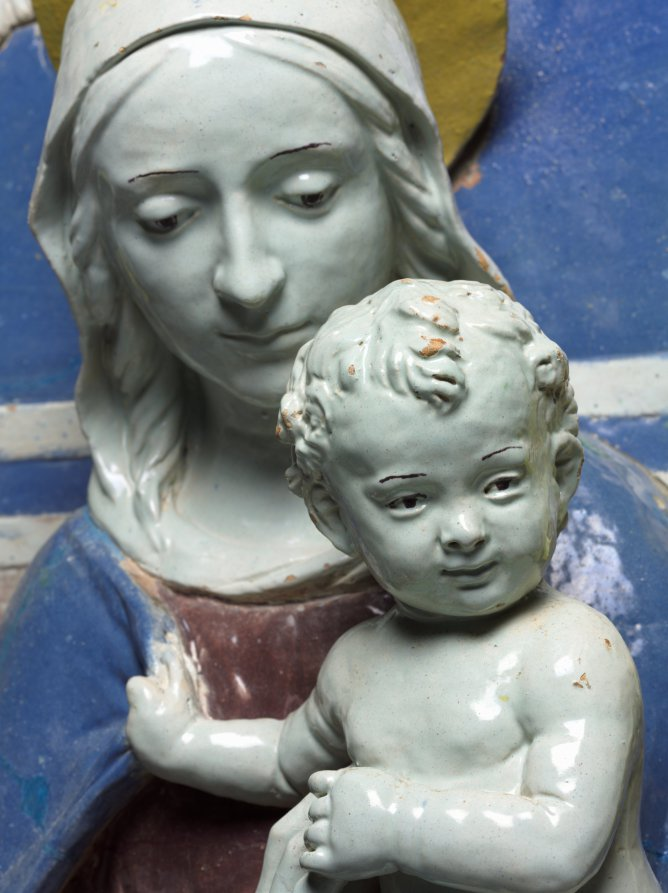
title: Virgin and Child Enthroned with Saints Francis and Giovanni Gualberto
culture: Italy, Florence, 16th century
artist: Benedetto Buglioni (Italian, 1461–1521)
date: c. 1510–20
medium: glazed terracotta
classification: Sculpture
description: The Madonna sits upon a throne with the Christ child standing on her knee. He is steadied by his mother, turning delicately to grasp her robe for support. On the left is Saint Francis, identified by his stigmata. On the right, Saint Giovanni Gualberto is identified by his monk's robe and distinctive processional cross. The brown robes of the saints, the purple of the Virgin's tunic, and the flesh tones of the figures contrast strongly against the bright blue background. In the semicircular sky behind the figures, three winged cherub heads emerge, representing a host of angels. Glazed terracotta is both durable and decorative and the gleaming white of this piece would have stood out in the darkness of a church. The medium was made popular by Renaissance artist Luca della Robbia and came into fashion as a substitute for expensive carved marble. A rounded arch frame embellished with fruit and flower garlands as well as egg-and-dart and cord moldings accompanied the work when it was acquired, but was later determined not to be original and removed. Buglioni's work bears the influence of the della Robbias, particularly in the simple color scheme. Buglioni likely worked in the studio of Luca's nephew, Andrea, where he would have learned the technique of glazing terracotta.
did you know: The unusual purple hue is particular to the artist.